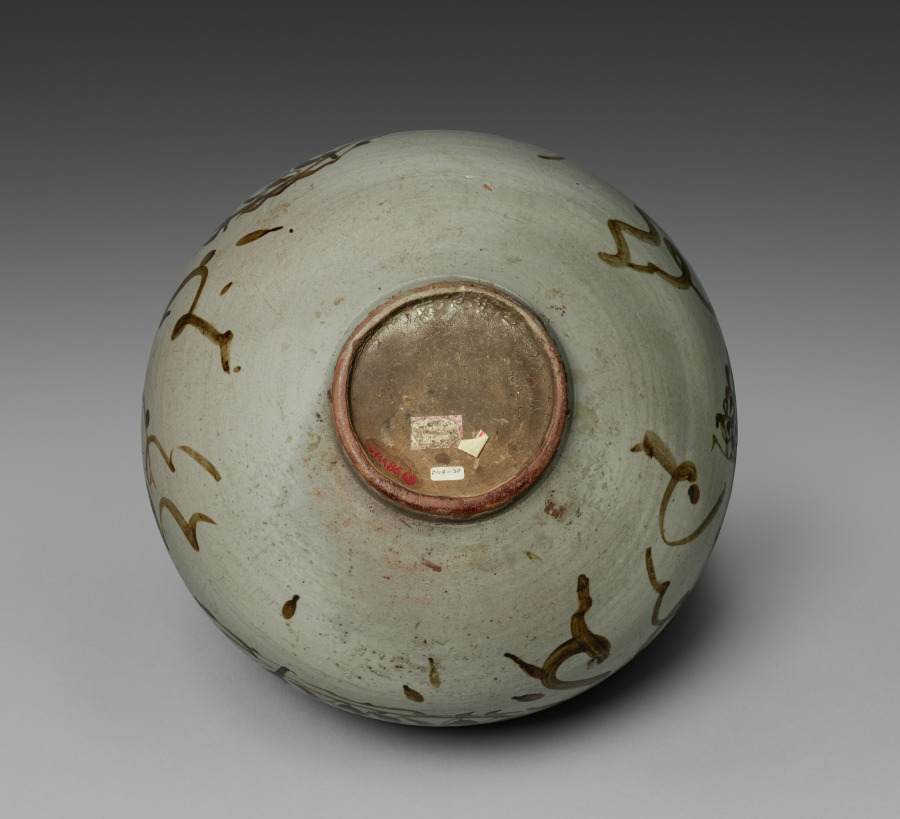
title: Jar with Dragon and Clouds Design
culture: Korea, Joseon dynasty (1392–1910)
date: late 1600s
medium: porcelain with underglaze iron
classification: Ceramic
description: In traditional Korean art, dragons were used as an emblem of royalty. Over centuries, the ways of depicting this powerful mythical creature varied in response to artistic trends and socioeconomic changes. Here, the artist imagined with free-flowing calligraphic brushstrokes a whimsical dragon with bulging eyes who wraps his scaled body around the vessel. This piece was acquired from the London Gallery in Tokyo, Japan. Its owner, Tajima Mitsuru (born about 1936) is regarded as one of the pioneering Japanese art dealers to cultivate lasting relationships directly with collectors and museums in the United States.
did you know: A mythical creature believed to have the power to make rain, the dragon is a prominent symbol of rulers in premodern East Asia; the image of dragons was used exclusively for the king's paraphernalia.